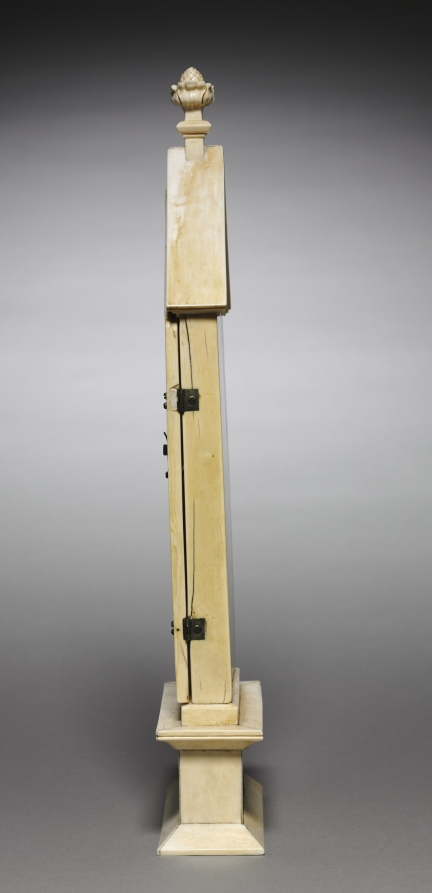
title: Triptych: The Life of the Virgin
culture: France, Lorraine?, or Austria?, Gothic period, 14th century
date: c. 1325–1350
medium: ivory, traces of gilding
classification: Ivory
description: The Virgin and Child, standing beneath a three-part arch, occupy the central plaque of this triptych. On the wings are carved four scenes from the life of the Virgin: the Annunciation, the Visitation, the Adoration of the Magi, and Christ's Presentation in the Temple. By the end of the 12th century, devotional objects like this became widespread in many parts of Western Europe as a result of the growing cult of the Virgin.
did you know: The pinnacle, roof moldings, and base are modern additions attached before the object entered our collection.